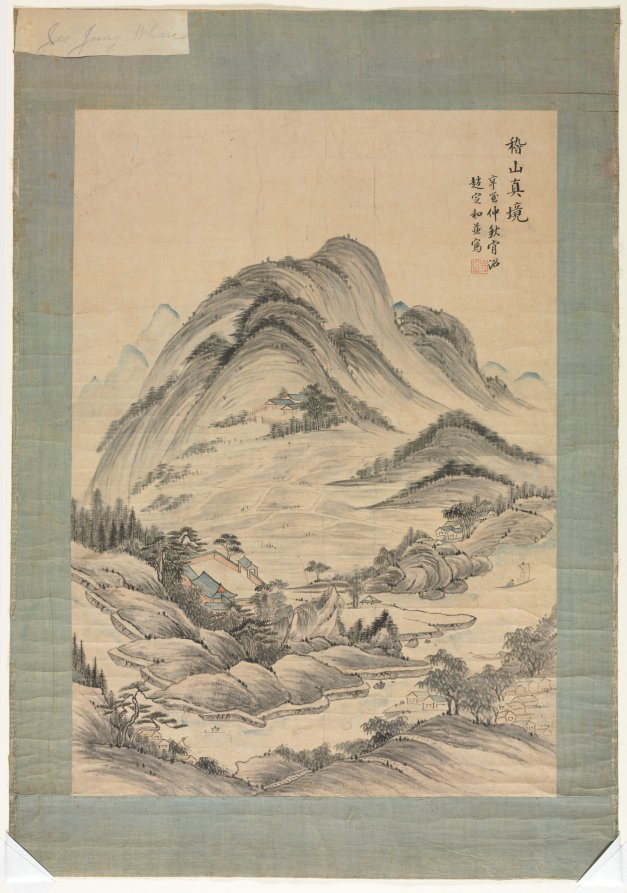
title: Landscape with Streams and Mountains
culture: Korea, Joseon dynasty (1392–1910)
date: late 1700s or early 1800s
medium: Ink and color on paper with a silk border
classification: Painting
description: The tradition of landscape painting that details actual natural sites and captures their topographic features in Korea began in the 1700s and continued onward. Such landscape style based actual sites and the artist's observation is called True-view landscape painting.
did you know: Topographic landscape painting such as this hanging scroll became popular in Korea during the 18th and 19th centuries.